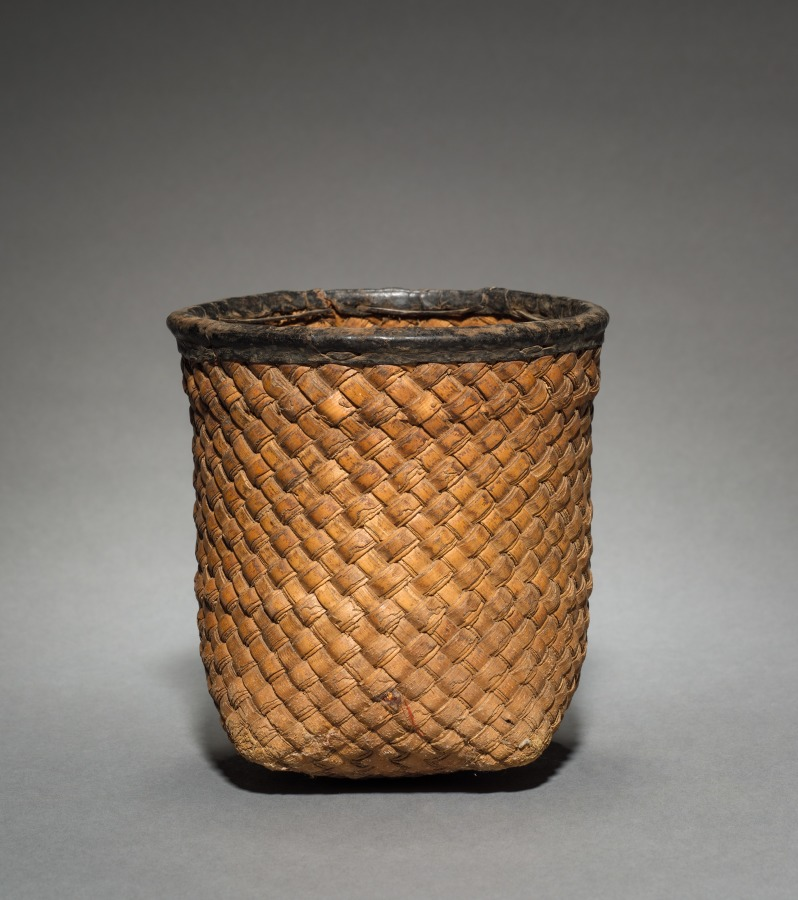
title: One of Ten Nesting Wedding Baskets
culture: Africa, Western Africa, Burkina Faso, Lobi–style maker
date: c. 1900s?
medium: Plant fiber and leather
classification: Vessels